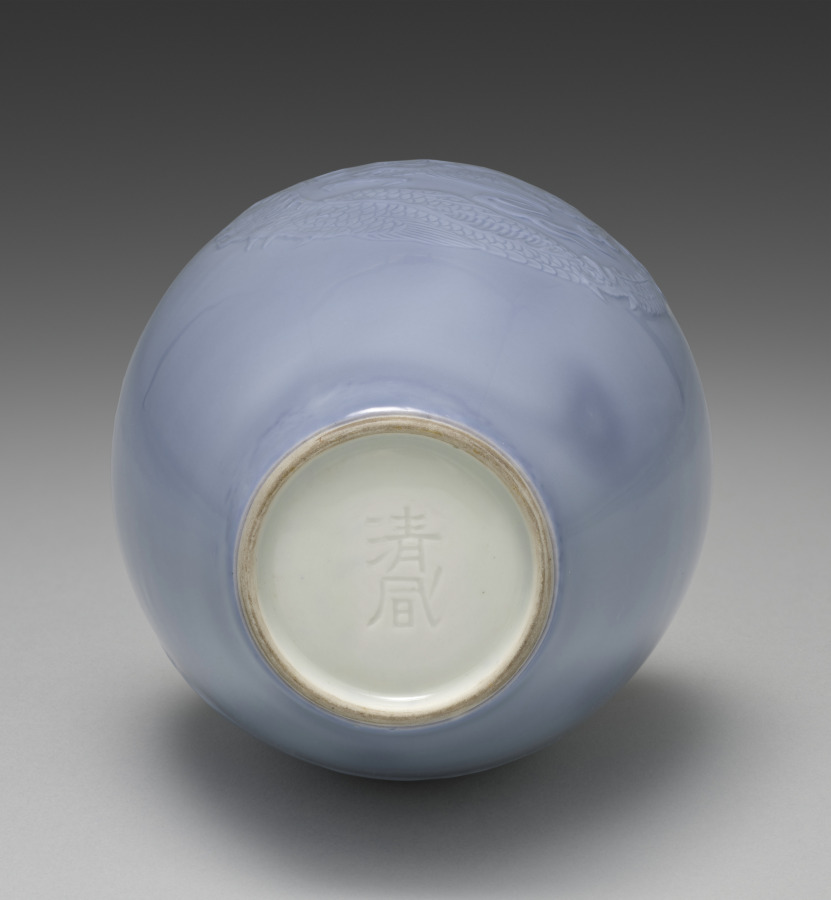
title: Vase with Dragon Roundels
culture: Japan, Meiji period (1868–1912)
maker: Seifū Yohei III (Japanese, 1851–1914)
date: 1900–1914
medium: Porcelain with purple glaze and molded and carved design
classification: Ceramic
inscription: 清風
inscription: 成山清風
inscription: The top of the box lid describes the vase.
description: Each side of this lavender-colored vase is nearly covered with a low-relief design of a four-clawed dragon curled around a flaming jewel. The box lid carries an attestation by Yohei IV that the vase was produced by his predecessor, and the signature on the base is one Yohei III used later in his career. The lid also makes reference to Jun (J. Kin) ware, which was made in numerous kilns in what is now Yuzhou or Yuxian in Henan Province, China, during the Northern Song dynasty. Some Jun wares had an opalescent purple glaze, which was clearly the inspiration for the color seen on this vase.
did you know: Kyoto-based Japanese ceramist Seifū Yohei III (1851–1914) admired the glaze colors found on Chinese porcelain and tried to replicate them through intensive experimentation.